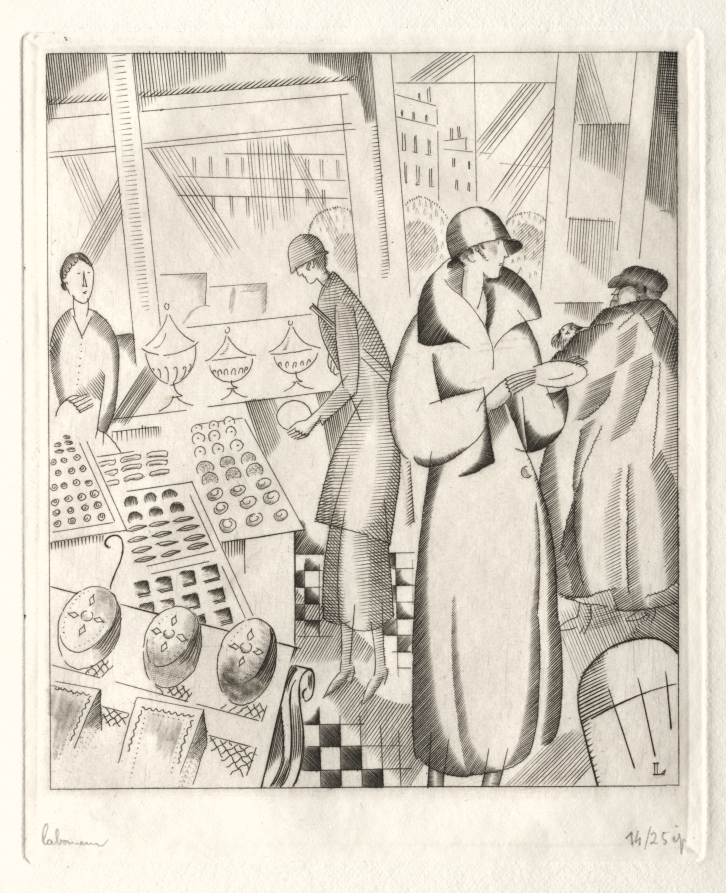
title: At the Patisserie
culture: France, 20th century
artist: Jean-Émile Laboureur (French, 1877–1943)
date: 1924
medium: engraving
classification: Print